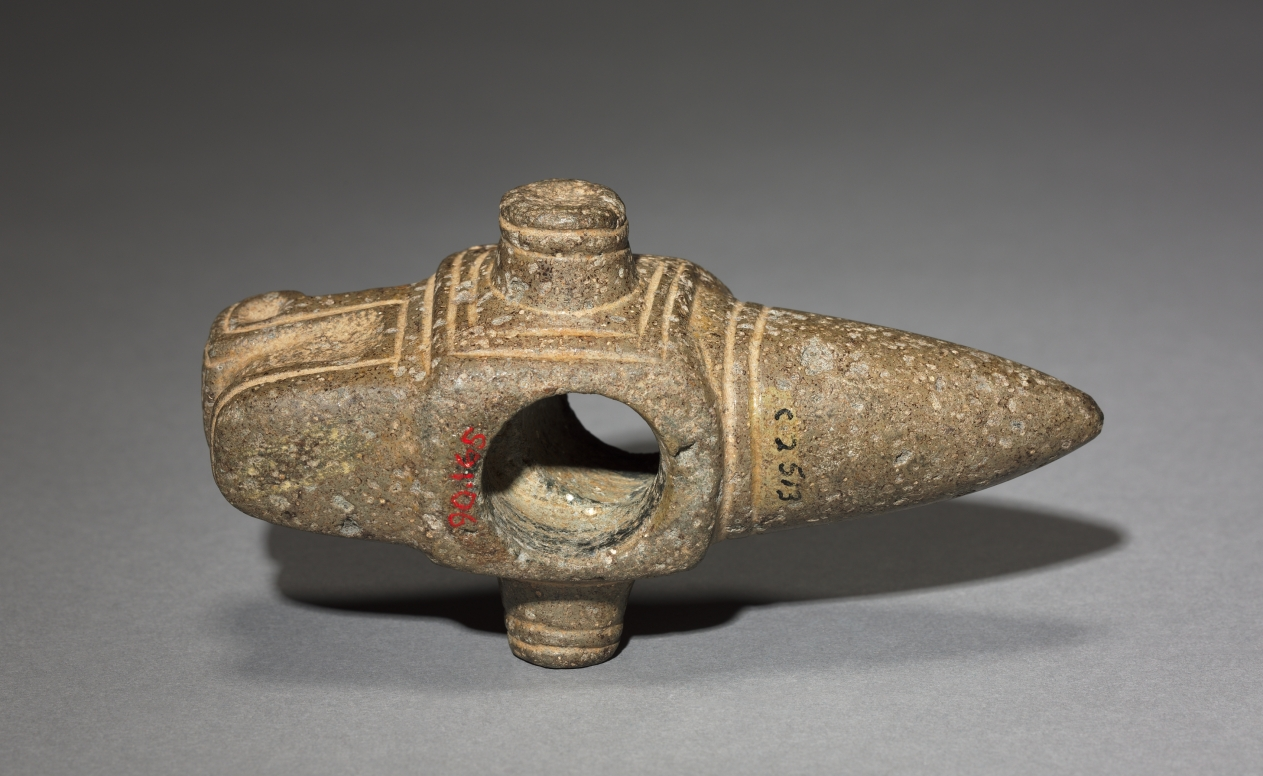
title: Mace Head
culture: Costa Rica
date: 300–500 CE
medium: pecked and polished gray stone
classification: Sculpture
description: Once mounted on wooden shafts, elaborately shaped mace (club) heads like this one probably were not used as weapons. Rather, they could have served as emblems of chiefly authority, group insignia, the heads of ceremonial weapons, or all three. They eventually were placed in elite graves. The back-curled nose on this example may refer to a crocodile or caiman.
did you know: In ancient Costa Rica, it was believed that the world rested on the back of a crocodile.